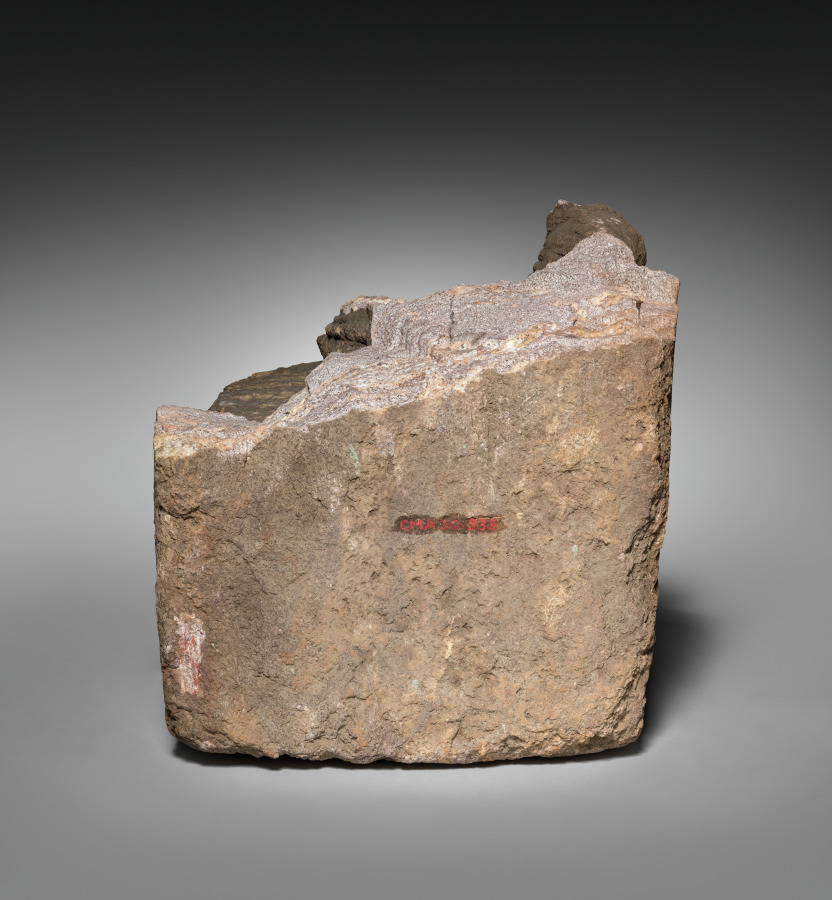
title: Base and Feet of Devata or Yakshi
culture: India, Province of Orissa, 20th century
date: 20th century fake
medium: sandstone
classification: Sculpture